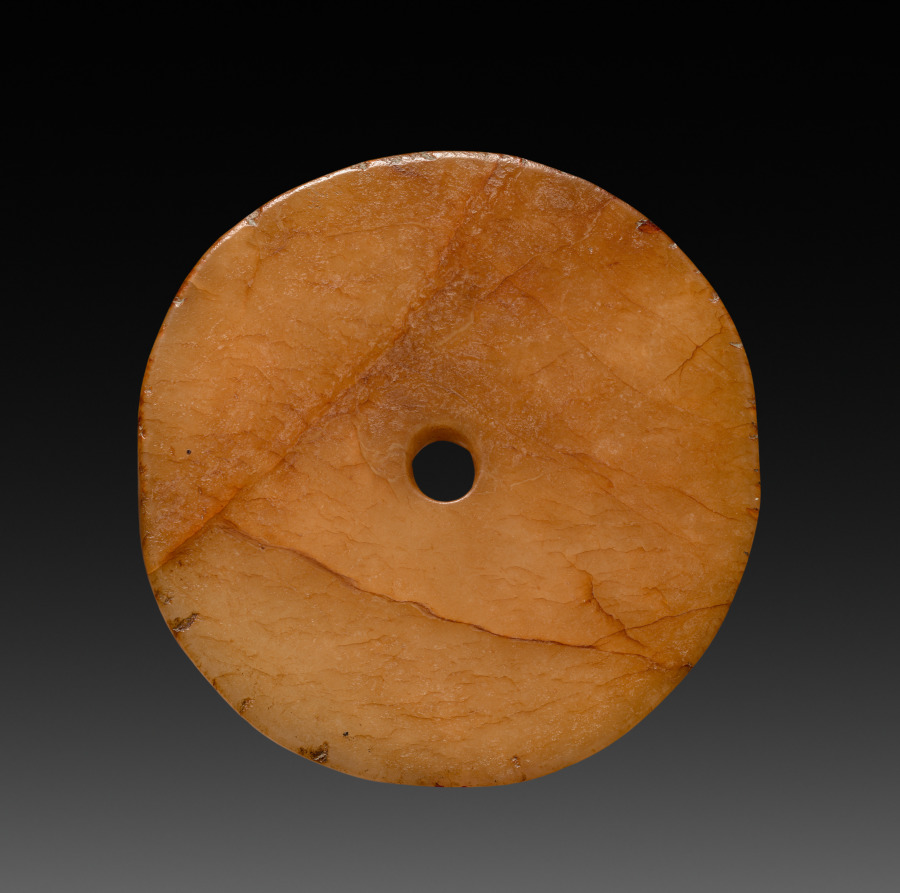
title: Round Ornament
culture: China, Han dynasty (202 BCE–220 CE)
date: 206 BCE–220 CE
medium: jade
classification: Jade